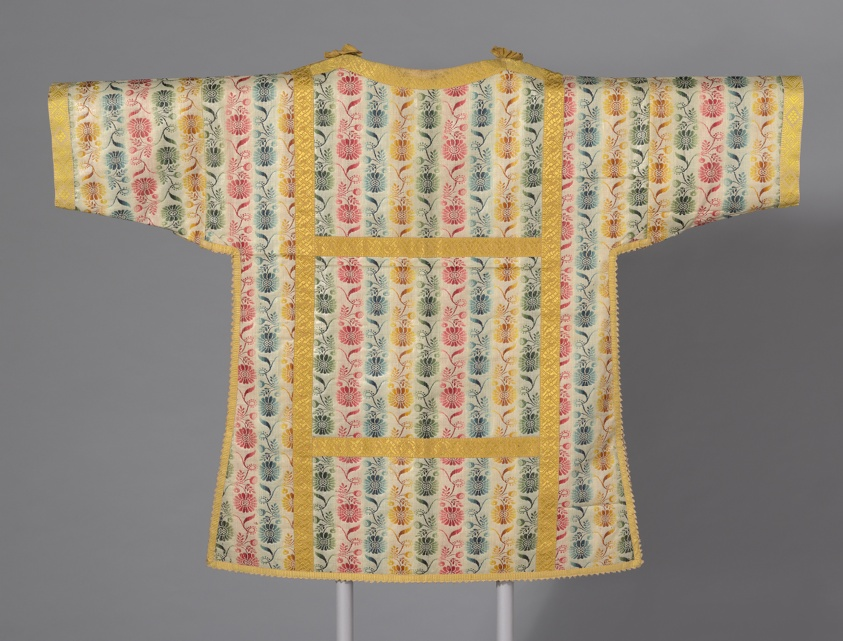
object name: Textile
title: Dalmatic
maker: England, possibly Nottingham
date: Mid–19th century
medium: Wool, plain weave; glazed and calenderized; with wool supplementary patterning wefts; applied woven tape; edged with woven tape with looped weft fringe; applied rosettes; lined with cotton, plain weave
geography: Nottingham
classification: textile; weaving; liturgical